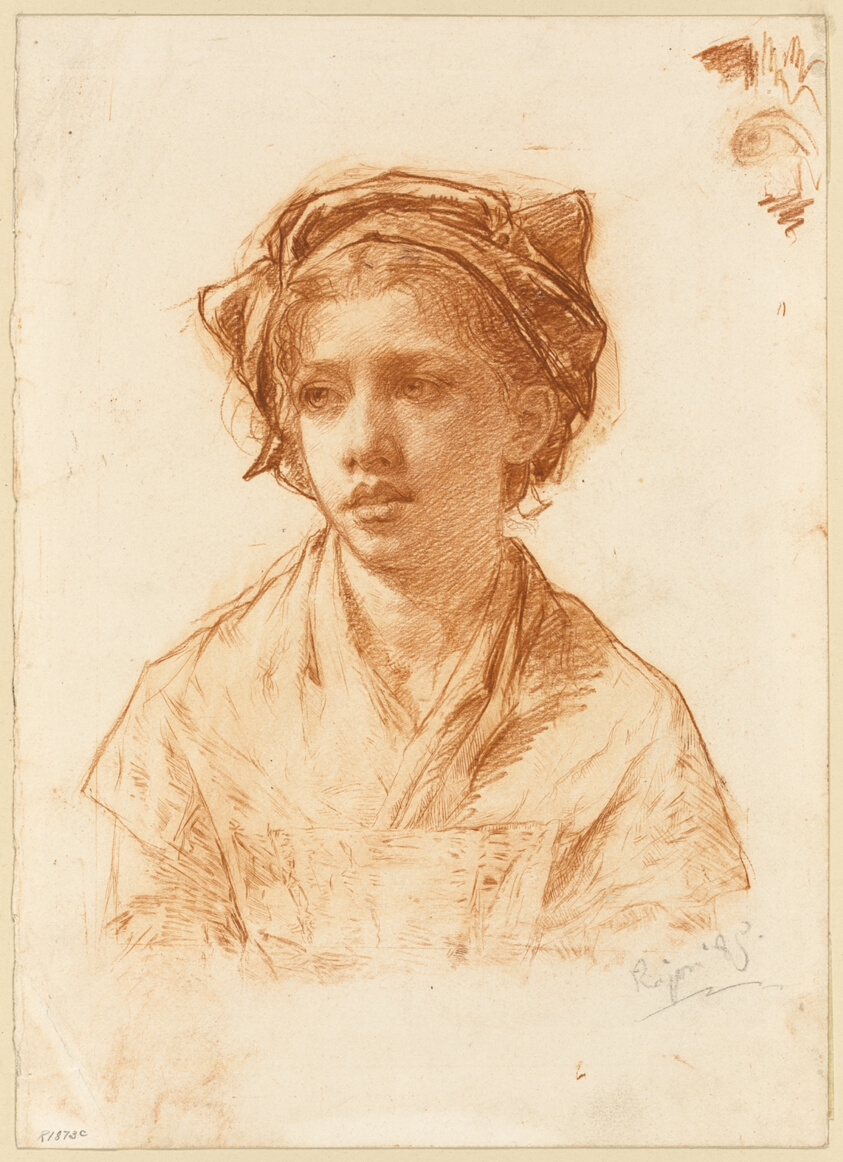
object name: Drawing and Watercolor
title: Bust of a Peasant Girl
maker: Paul Adolphe Rajon (French, 1843-1888)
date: 1885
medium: Red chalk, over etching, on ivory wove paper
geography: France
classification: chalk; drawings (visual works); prints and drawing